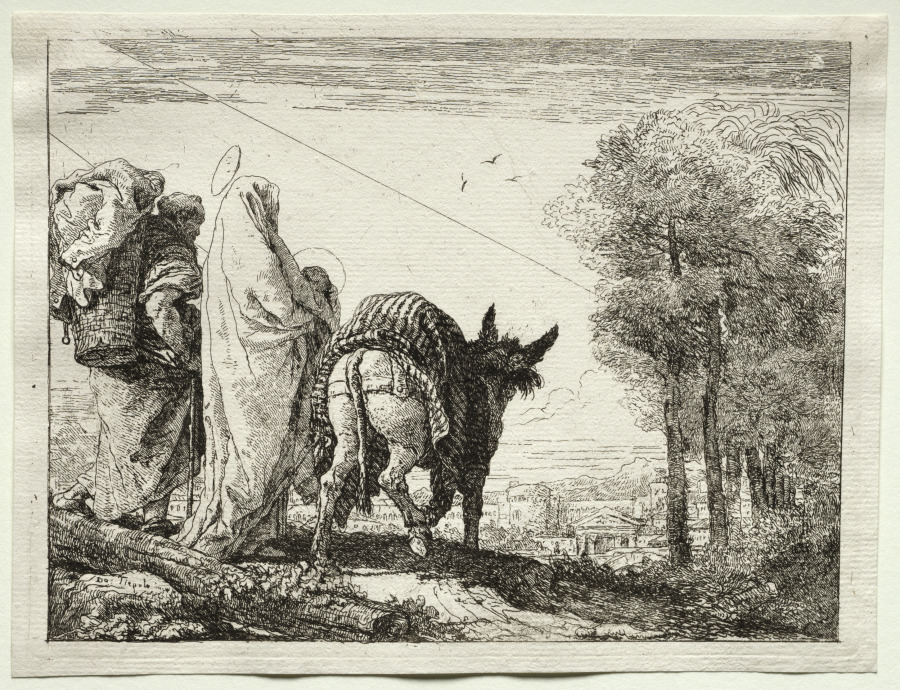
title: Flight into Egypt: The Holy Family Approaching a Village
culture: Italy, 18th century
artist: Giovanni Domenico Tiepolo (Italian, 1727–1804)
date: 1750–53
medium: etching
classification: Print